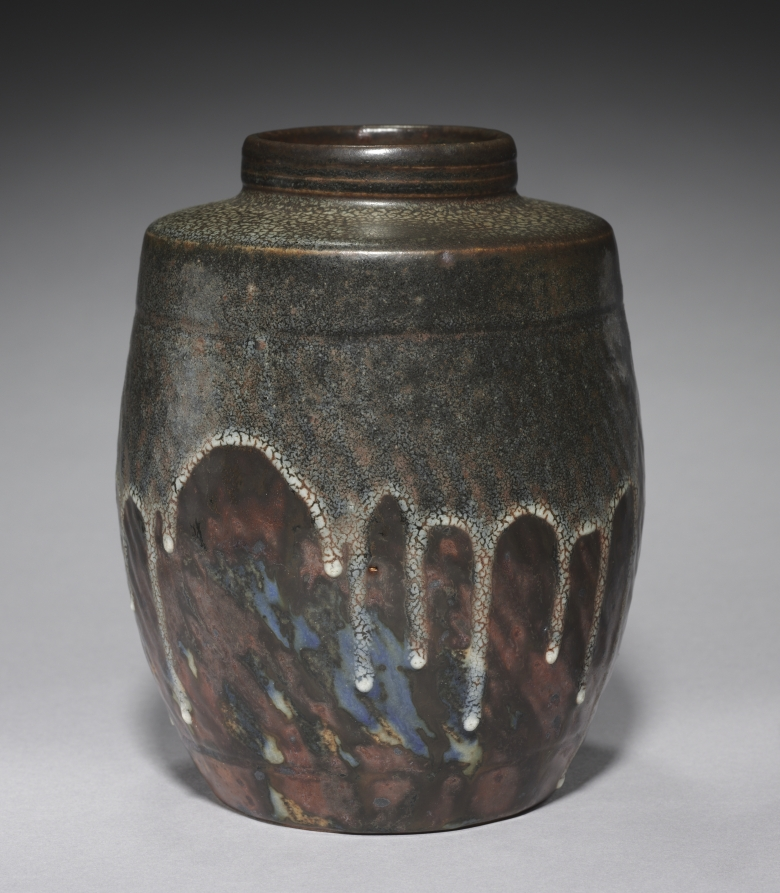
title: Vase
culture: France, early 20th Century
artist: Paul Jeanneney (French, 1861–1920)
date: c. 1900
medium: stoneware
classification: Ceramic